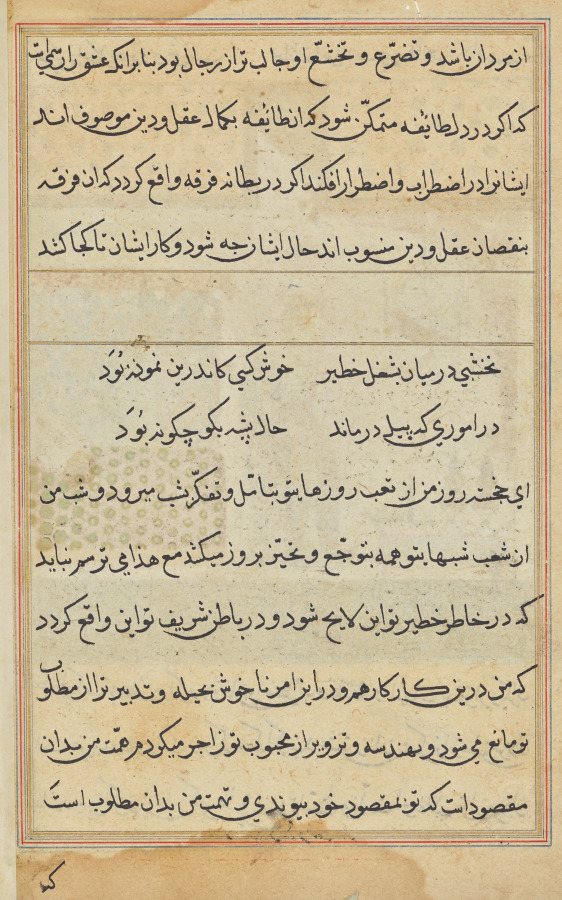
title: Page from Tales of a Parrot (Tuti-nama): text page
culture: Mughal India, court of Akbar (reigned 1556–1605)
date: c. 1560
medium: gum tempera, ink, and gold on paper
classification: Painting